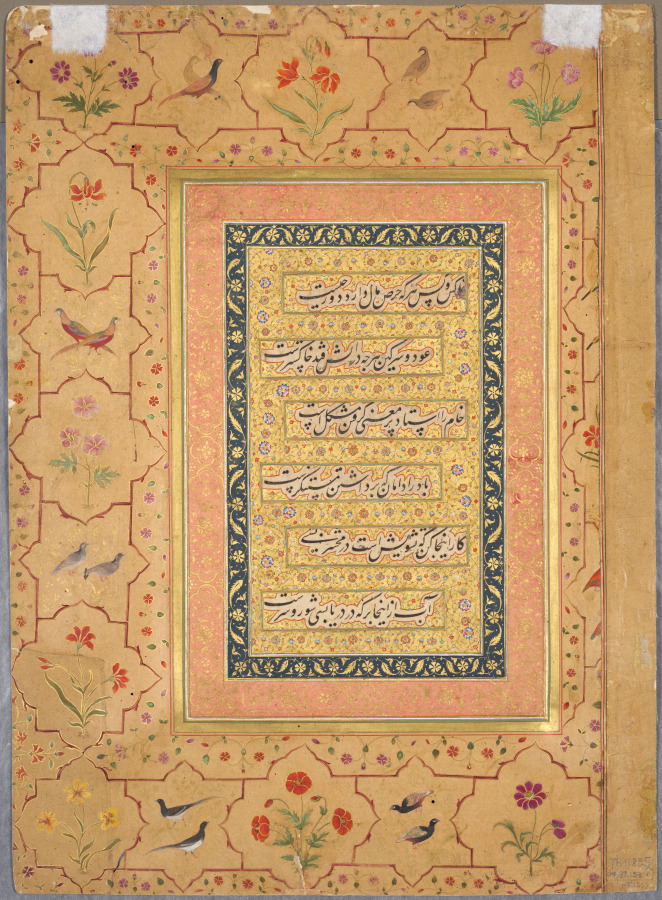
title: Leaf from the Late Shah Jahan Album: Harem Night-Bathing Scene (recto); Calligraphy Framed by an Ornamental Border of Flowers and Birds (verso)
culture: Mughal India, court of Shah Jahan (reigned 1628–58)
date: c. 1650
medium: Gum tempera, ink, and gold on paper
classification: Painting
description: The subject of women bathing persisted throughout the 1500s and into the 1600s. Akbar’s grandson Shah Jahan—the Mughal emperor who built the Taj Mahal—continued to support the work of artists in the imperial atelier. His taste was more formal and subdued, without as much interest in illuminations of fantastic tales. This scene is a single painting mounted in an album. The white marble terraces glow under the moonlight. An attendant carrying a cloth over one arm looks on with awe at the beauty of the scene. He is probably a eunuch, since men were not permitted to serve in the women’s quarters of a Mughal palace.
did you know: The lone male figure points to his mouth in a gesture of astonishment, perhaps at the beauty of the scene.